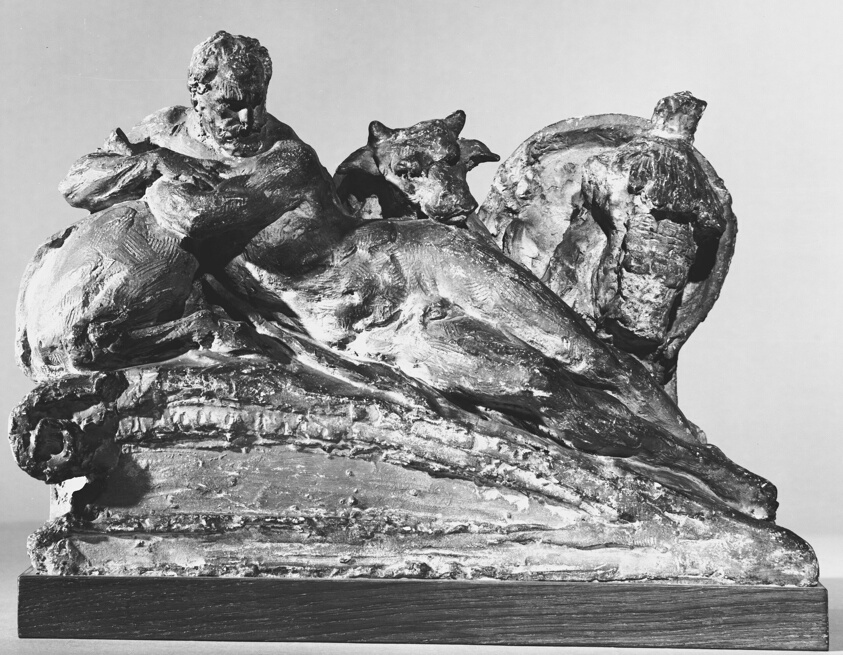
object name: Sculpture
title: Allegory of Agriculture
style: nineteenth century, 19th century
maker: Jean Baptiste Carpeaux (French, 1827–1875)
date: 1865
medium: Plaster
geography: France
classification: statuette; french; sculpture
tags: agriculture, sculpture, model, animals, cows, man, nudes